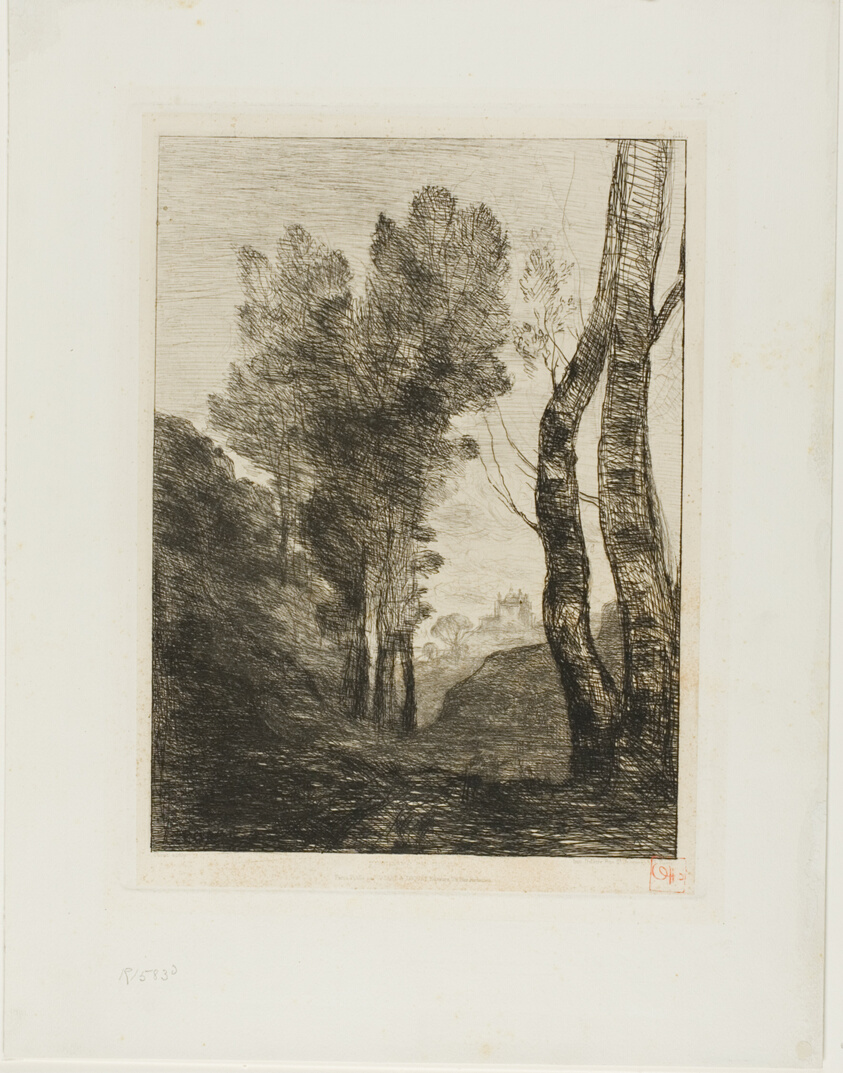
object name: Print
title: Outskirts of Rome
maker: Jean-Baptiste-Camille Corot (French, 1796-1875); printed by Auguste Delâtre (French, 1822-1907); published by Cadart et Luquet, Editeurs (French, 1801-1900)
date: 1866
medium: Etching on ivory China paper laid down on white wove paper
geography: France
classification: etching; print; prints and drawing